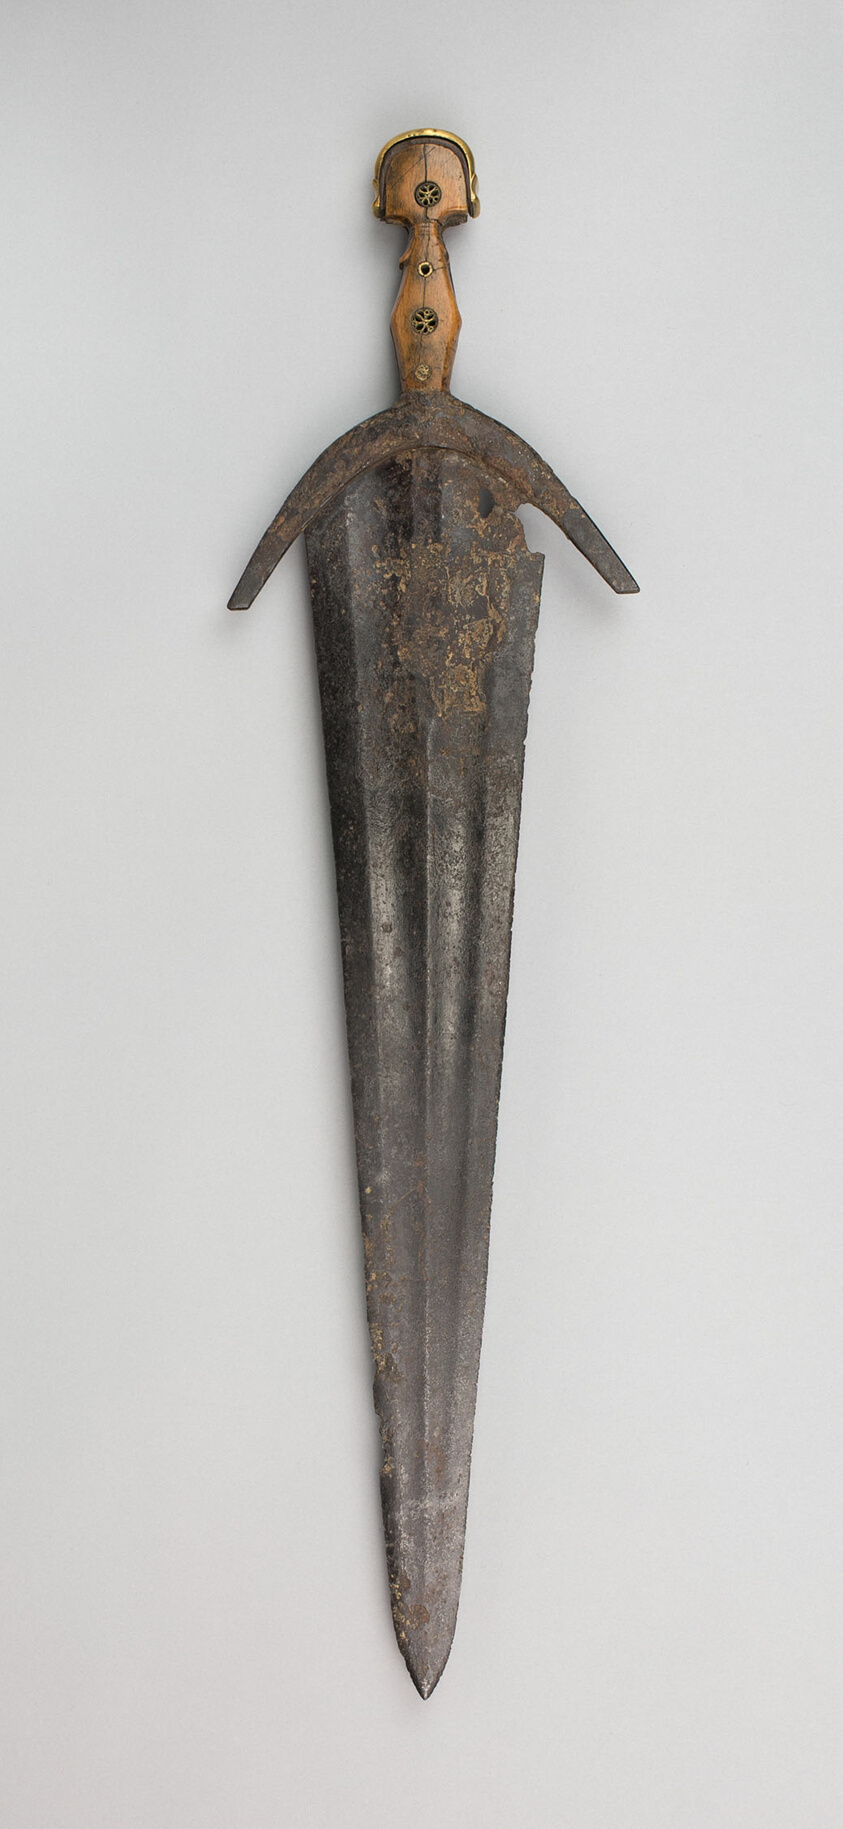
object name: Arms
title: Cinquedea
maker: Italian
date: About 1500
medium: Bone, bronze, and brass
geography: Italy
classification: edged weapon-dagger; arms; arms and armor